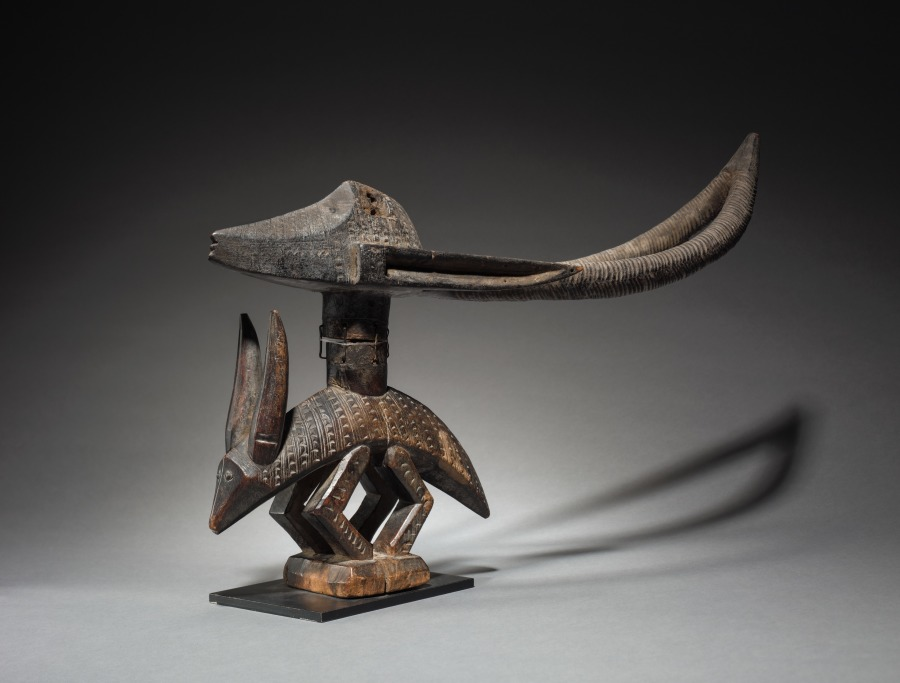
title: Double-Headed Headdress (N'gonzon Koun)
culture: Africa, West Africa, Mali, Bamana-style blacksmith-carver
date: 1900s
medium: Wood and iron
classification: Mask